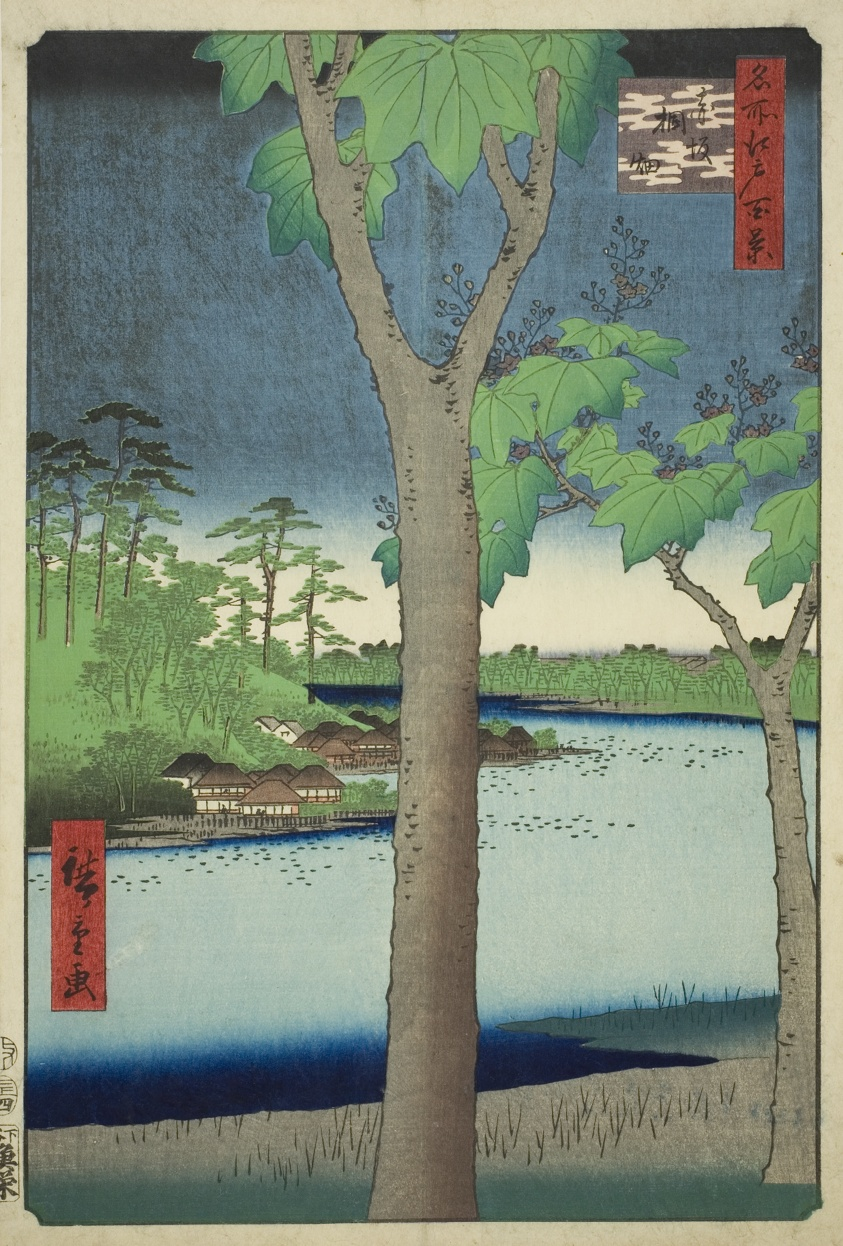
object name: Print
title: The Paulownia Grove at Akasaka (Akasaka Kiribatake), from the series "One Hundred Famous Views of Edo (Meisho Edo hyakkei)"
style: Japanese (culture or style)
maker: Utagawa Hiroshige 歌川 広重; Japanese, 1797-1858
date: 1856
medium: Color woodblock print; oban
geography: Japan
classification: woodblock print; print; asian art